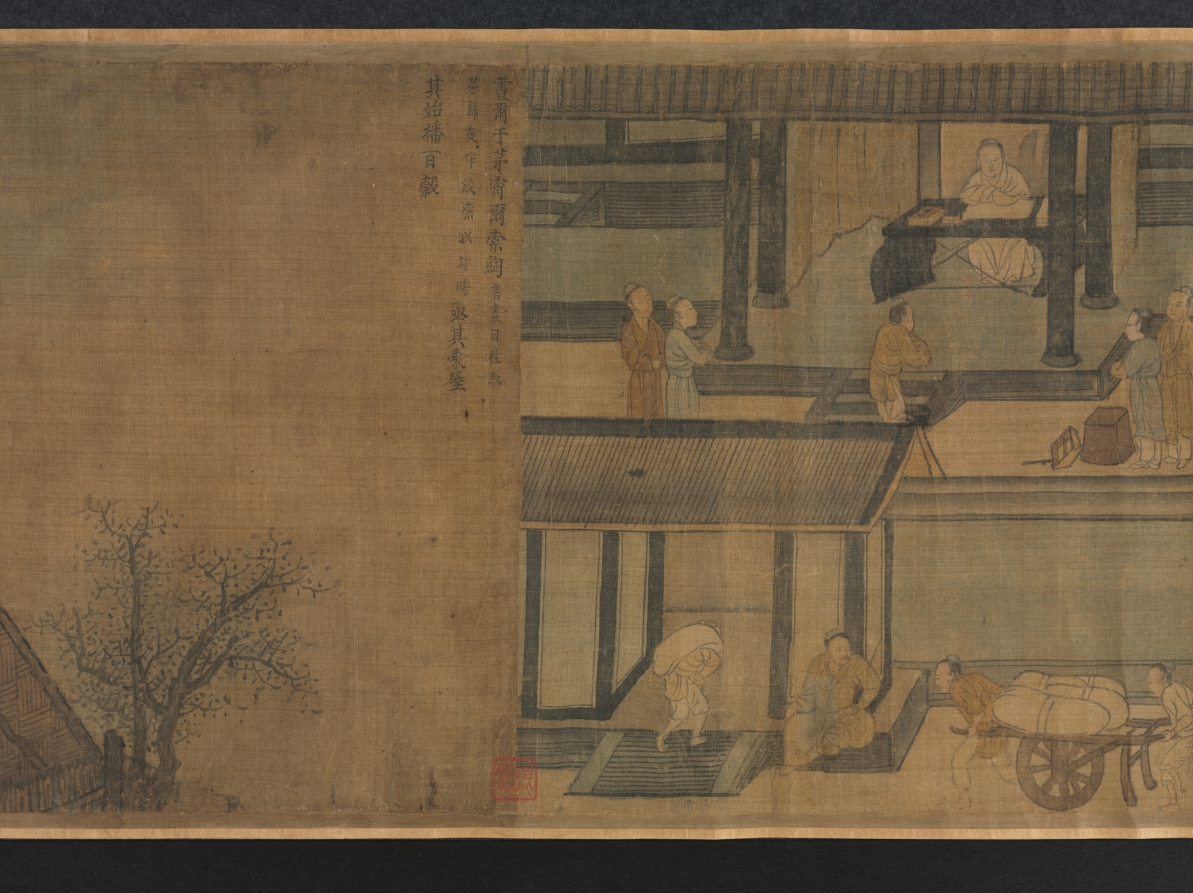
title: "Seventh Month" from the Odes of Bin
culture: China, Southern Song dynasty (1127-1279)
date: 1200s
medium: Handscroll; ink and color on silk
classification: Painting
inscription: Colophons: 1. [on the frontispiece] by the Qianlong emperor (dated 1741). 2. by Lu Wan (dated Zhengde dingchou, 1517). 2. by the Jiaqing emperor (dated 1807).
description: According to Confucian thought, the ruler looks after the well-being of his people which involves agricultural activities. Seventh Month from the ancient Odes of Bin in the Shijing (Book of Poetry) describes occupations throughout the year, including plowing, harvesting, hunting, making clothes, and observing rituals. The earliest illustrations of these Odes accompanied by text were commissioned by Southern Song emperor Gaozong (reigned 1127–1162). As the lower Yangzi delta had become the new seat of government, Gaozong had sets of these illustrations produced by court artists to revive the dynasty and convince the Confucian officialelite of his legitimacy to rule.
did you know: The Odes of Bin appears in the classic Shijing (Book of Poetry), an anthology of more than 300 poems, folk songs, and ceremonial hymns that were originally chanted to music.